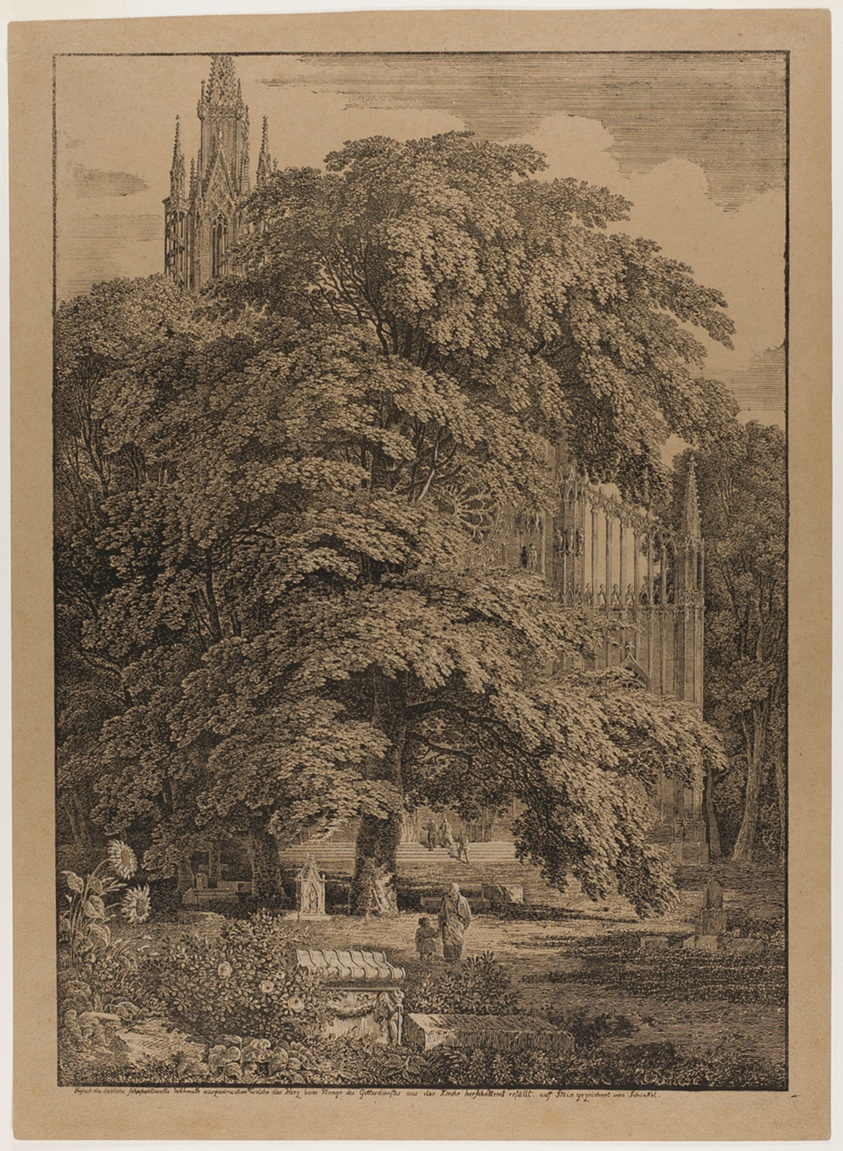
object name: Print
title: Gothic Church Behind an Oak Grove with Tombs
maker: Karl Friedrich Schinkel (German, 1781-1841)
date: 1810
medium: Lithograph in black ink with touches of opaque white watercolor on brown wove paper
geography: Germany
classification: lithograph; print; prints and drawing